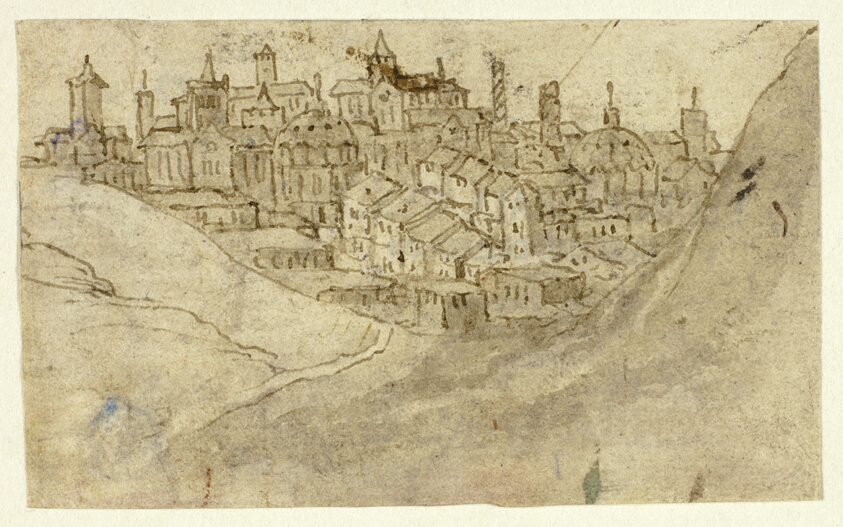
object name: Drawing and Watercolor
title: View of Hill Town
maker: Unknown Artist; Flemish, 17th century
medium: Pen and brown ink, and brush and brown wash, on cream laid paper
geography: Flanders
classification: pen and ink drawings; drawings (visual works); prints and drawing